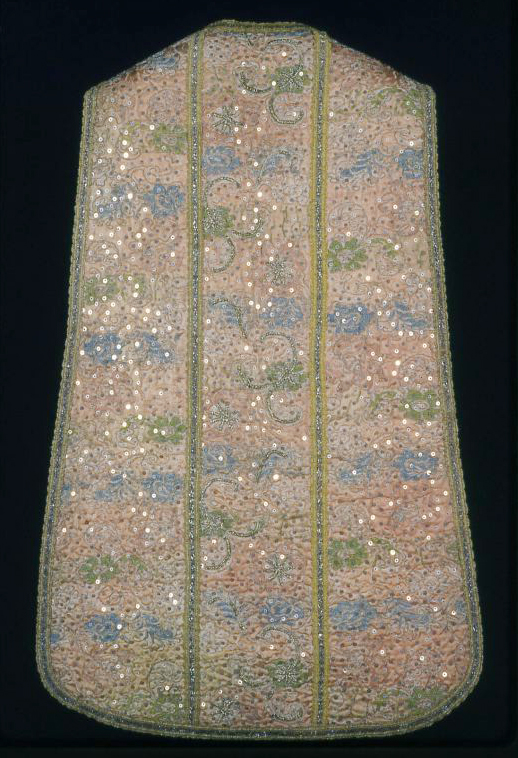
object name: Textile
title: Chasuble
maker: Italy or Spain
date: 1675/1725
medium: Silk, satin weave self-patterned by ground weft floats; embroidered with gilt- and silvered-metall-strip-wrapped hemp in couching and padded couching; metal spangles; edged with woven tape tape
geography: Italy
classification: textile; needlework (visual works); liturgical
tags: vestments